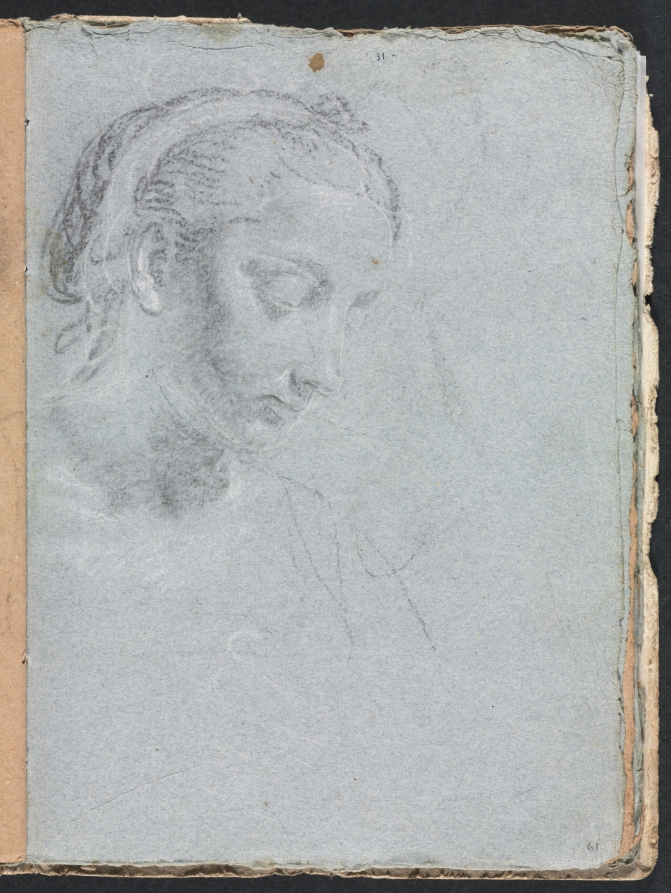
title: Verona Sketchbook: Head and shoulders of a woman (page 61)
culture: Italy, 18th century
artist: Francesco Lorenzi (Italian, 1723–1787)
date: 1760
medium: black chalk with white heightening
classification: Bound Volume